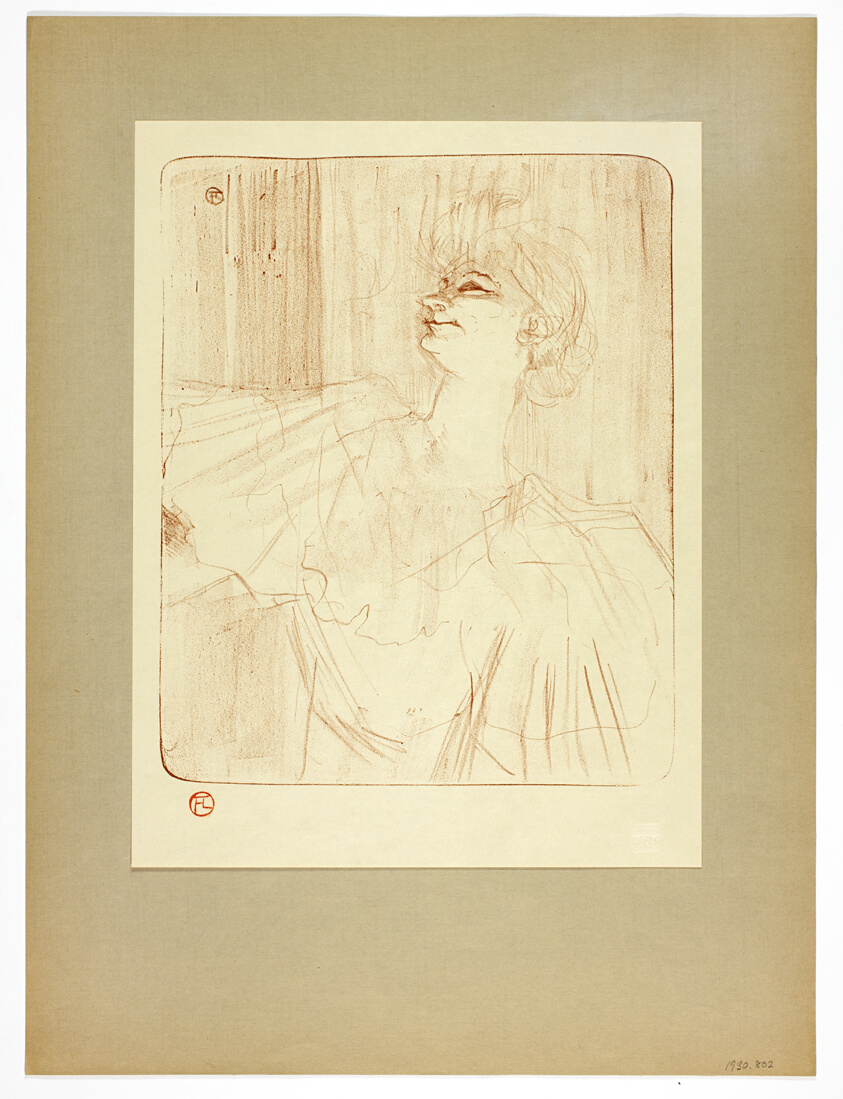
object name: Print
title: À Menilmontant by Bruant, plate four from Yvette Guilbert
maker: Henri de Toulouse-Lautrec (French, 1864-1901); printed by Westminster Press (English, 20th century); published by the Ernest Brown & Phillips (English, 20th century)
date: 1898, printed 1930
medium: Lithograph (crayon with scraper) in sanguine (red-brown) on cream wove paper hinged at top corners to gray-brown wove paper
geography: France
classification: lithograph; print; prints and drawing